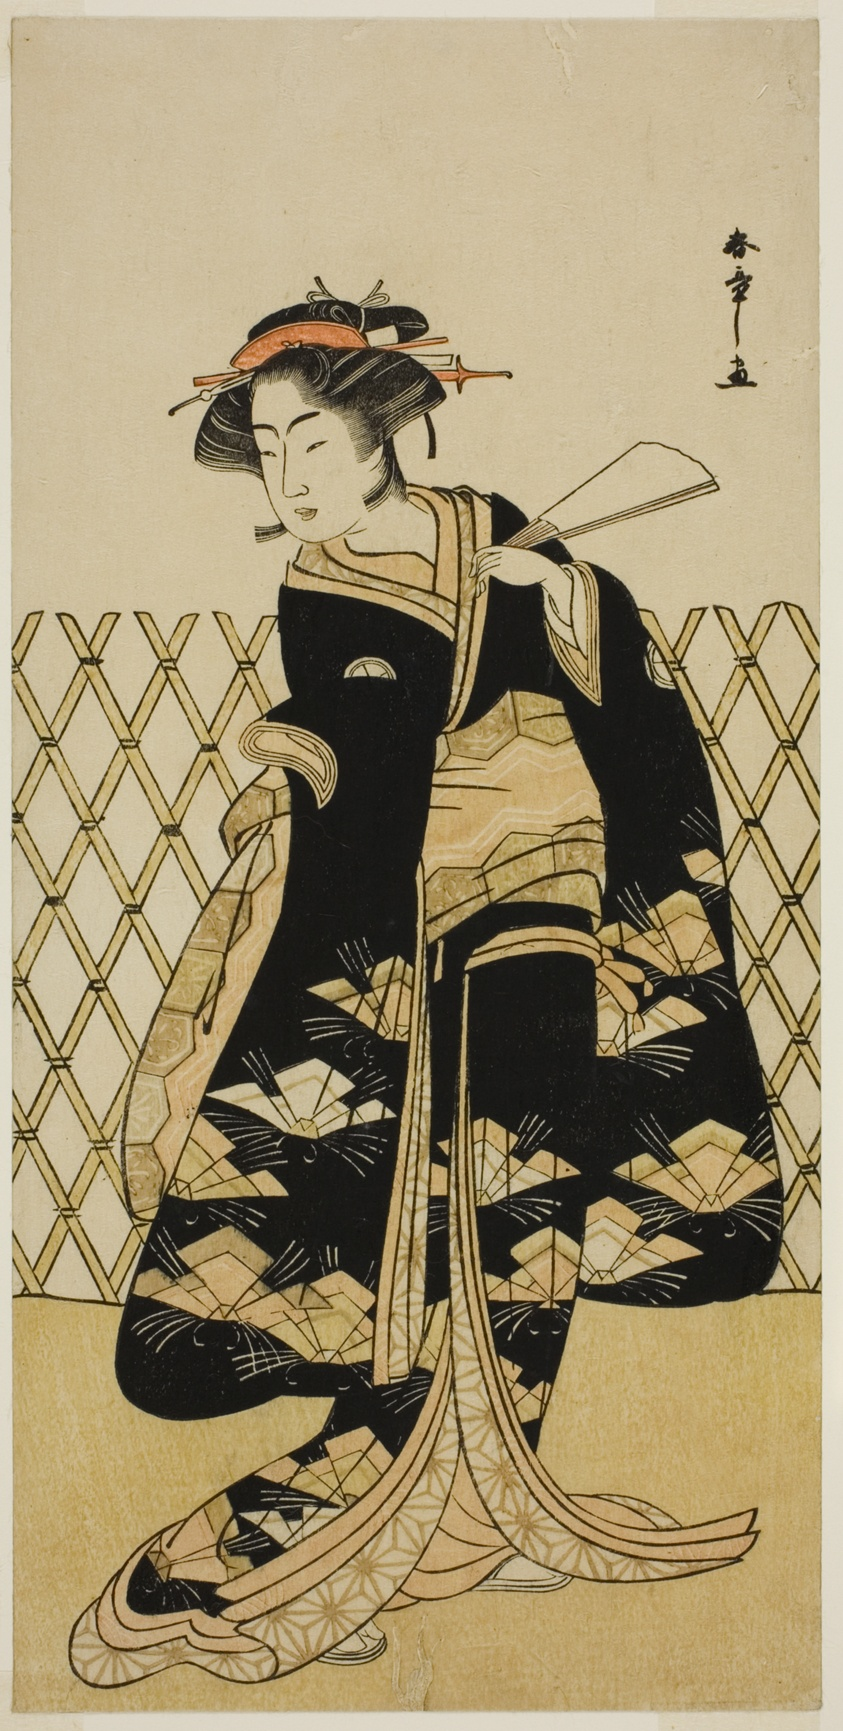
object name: Print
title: The Actor Iwai Hanshiro IV as Mitsuogiya Usukumo in the Play Shida Choja-bashira, Performed at the Nakamura Theater in the Eighth Month, 1781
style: Japanese (culture or style)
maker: Katsukawa Shunsho 勝川 春章; Japanese, 1726-1792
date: c. 1781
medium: Color woodblock print; hosoban; right sheet of diptych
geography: Japan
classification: woodblock print; print; asian art